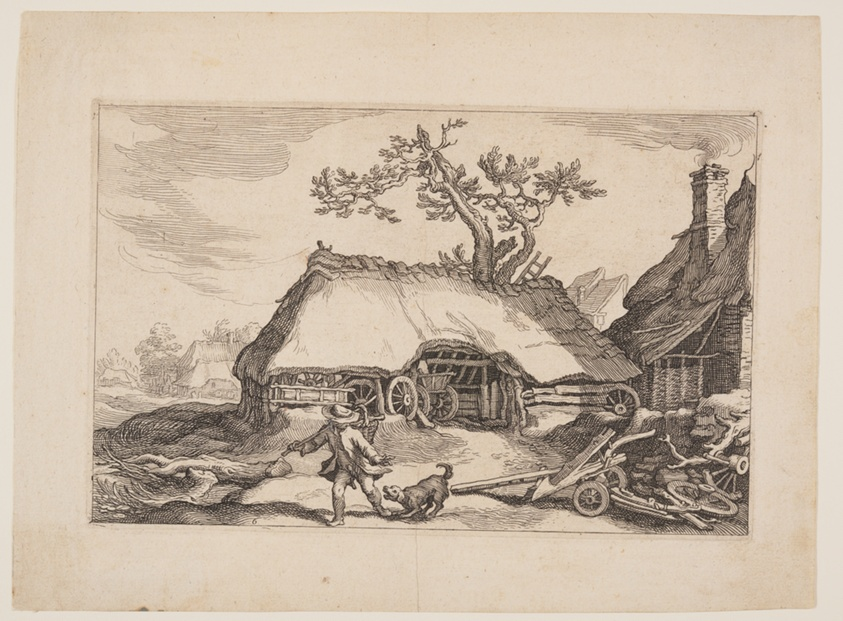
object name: Print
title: Plate 6, from Landscapes with Farmhouses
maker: Boëtius Adamsz. Bolswert (Flemish, 1580–1633); after Abraham Bloemaert (Dutch, 1566–1651)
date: 1614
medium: Etching on ivory laid paper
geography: Flanders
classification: print; paper; prints and drawing; etching